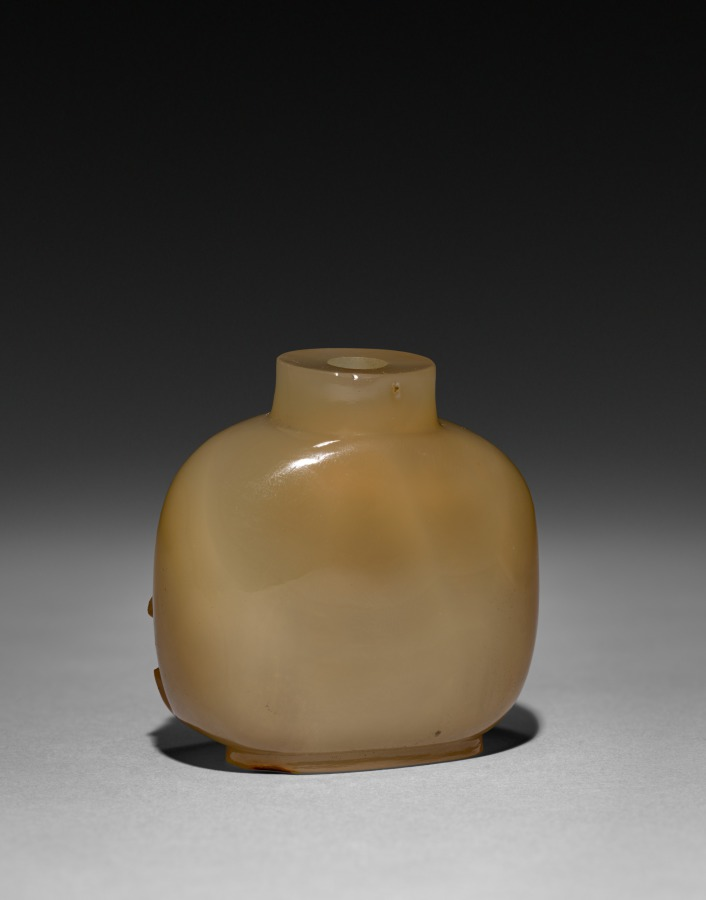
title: Snuff Bottle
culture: China, Qing dynasty (1644-1911)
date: 1644–1911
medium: glass and jade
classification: Glass